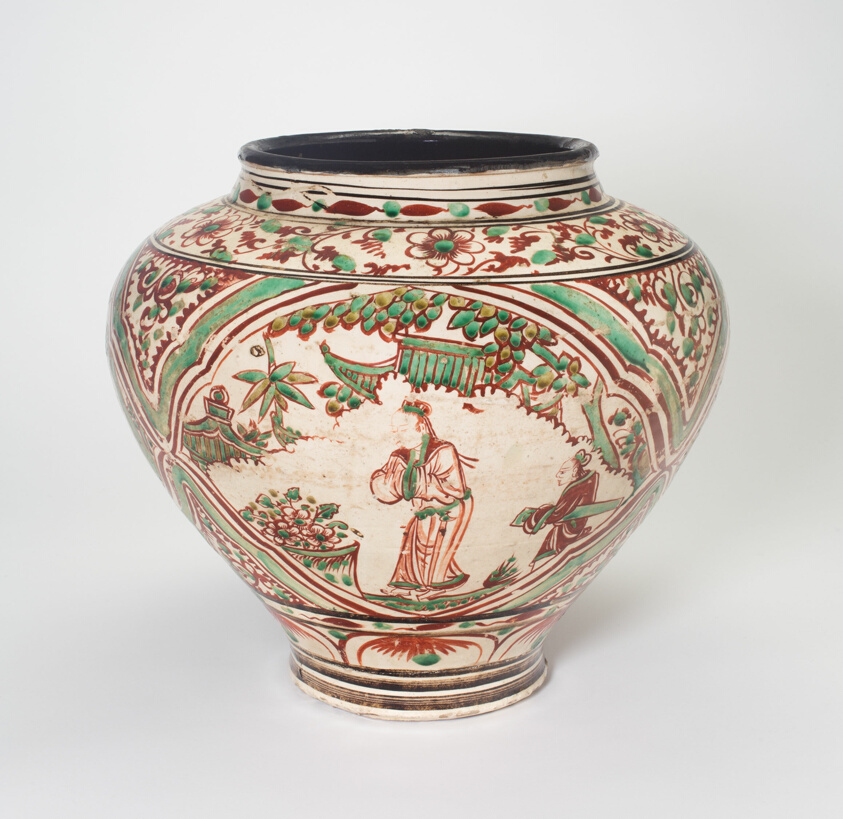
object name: Vessel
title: Jar with Figures in Garden Scenes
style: Chinese (culture or style)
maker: China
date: Ming dynasty (1368–1644)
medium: Cizhou ware; glazed stoneware with overglaze painting in black, red, green and greenish yellow enamels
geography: China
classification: stoneware; asian art; ceramics; vessel